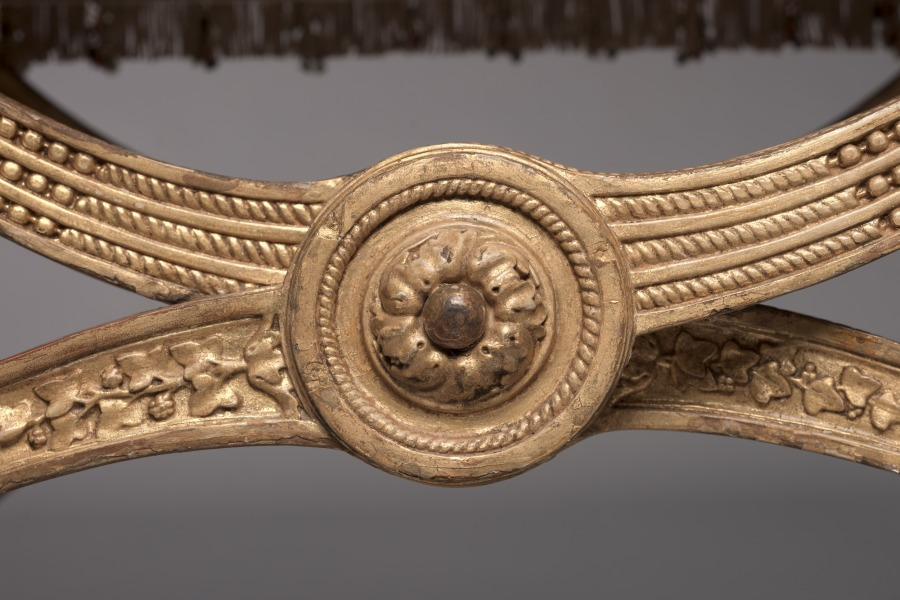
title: Stool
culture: France, 18th century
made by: Jean-Baptiste-Claude Sené (French, 1748–1803)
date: 1786–1787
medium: carved and gilded wood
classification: Furniture and woodwork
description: This stool was made in 1786-1787 for the Queen's gaming room at the palace of Compiègne.